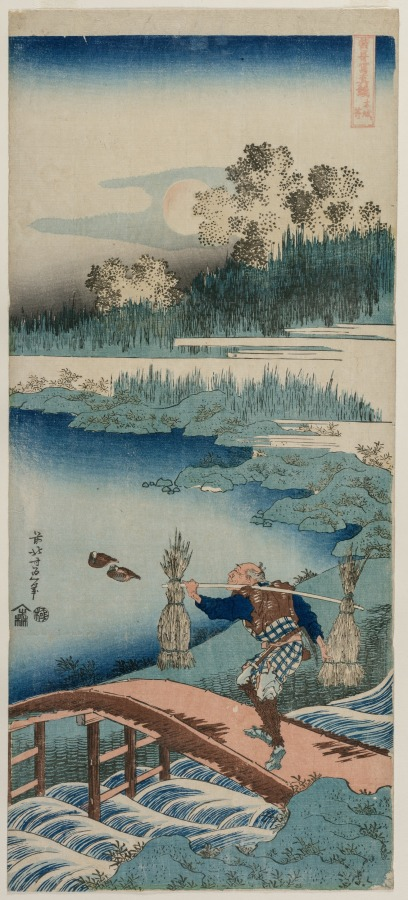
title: The Rush Gatherer, from the series A True Mirror of Chinese and Japanese Poetry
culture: Japan, Edo period (1615–1868)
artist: Katsushika Hokusai (Japanese, 1760–1849)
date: 1834–35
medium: color woodblock print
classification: Print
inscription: Signature: Zen Hokusai Iitsu hitsu Publisher: Moriya Jisuke (emblem) Censorship Seal: kiwame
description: The subject of this design may be related to a 1309 poem that contains the following lines: When I was cutting horse-tails The autumn moon appeared, Shining through the trees on Mount Sonahara.